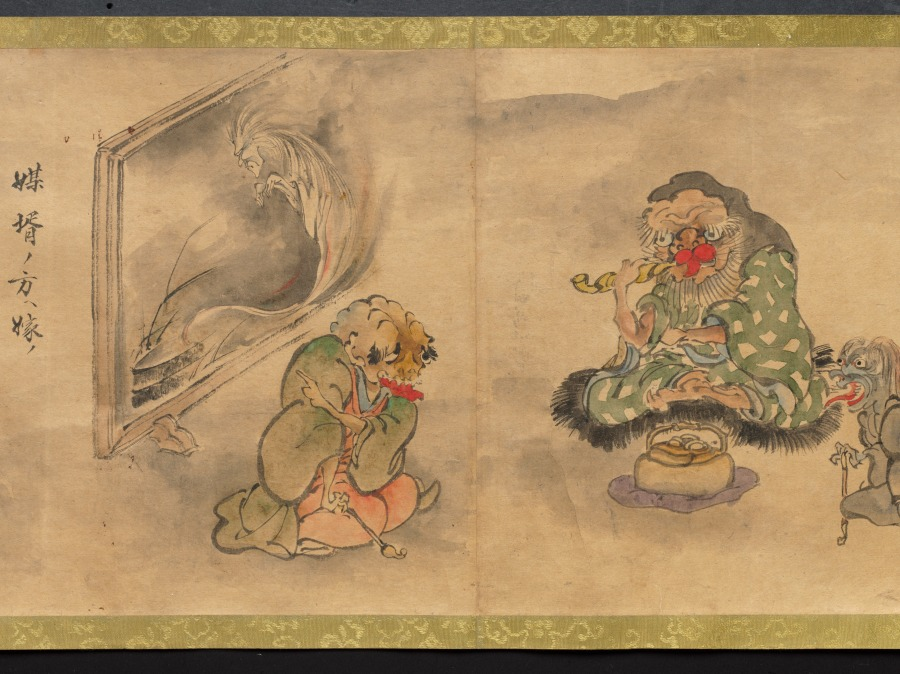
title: An Illustrated Marriage of Apparitions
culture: Japan, Edo period (1615–1868)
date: mid-1800s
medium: handscroll; ink and color on paper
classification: Painting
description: The matchmaking, engagement, wedding, and birth of the first child of two apparitions, or bakemono, literally "things that change," are illustrated in this whimsical, humorous handscroll. Japanese folklore abounds with such strange creatures, most famously represented in handscrolls featuring a procession of 100 supernatural monsters. Aside from a textual preface and cartouches indicating the content of the scenes, the tale is told visually. The artist and whereabouts of the original handscroll are unknown, but a number of other 19th-century copies by amateur painters exist in Japanese collections, attesting to its broad appeal.